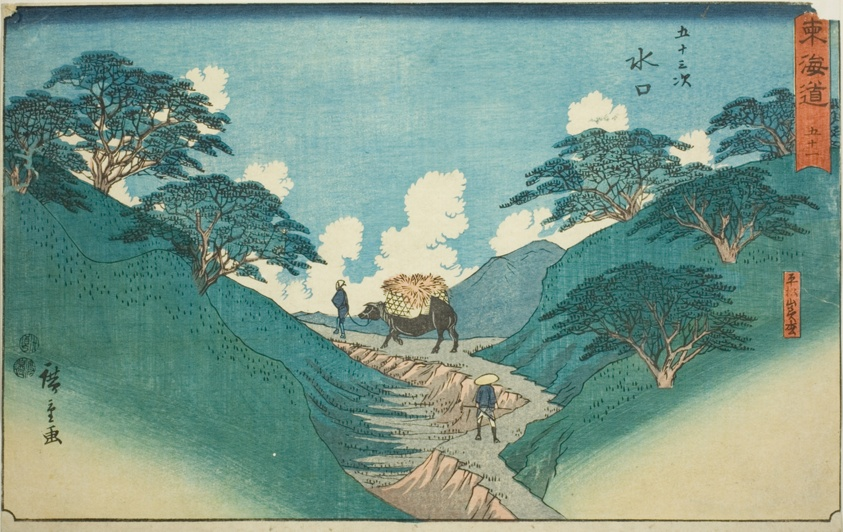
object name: Print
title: Minakuchi: The Beautiful Pine Trees at Mount Hiramatsu (Minakuchi, Hiramatsuyama bisho)—No. 51, from the series "Fifty-three Stations of the Tokaido (Tokaido gojusan tsugi)," also known as the Reisho Tokaido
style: Japanese (culture or style)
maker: Utagawa Hiroshige 歌川 広重; Japanese, 1797-1858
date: c. 1847/52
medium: Color woodblock print; oban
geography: Japan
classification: salted paper print; photograph; asian art; print